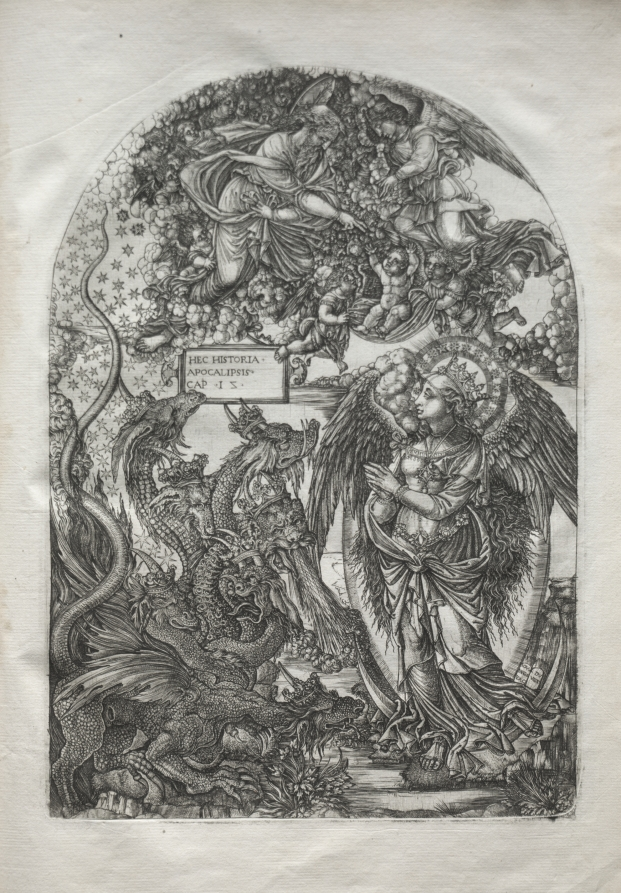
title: The Apocalypse: St. Michael and the Dragon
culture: France, 16th century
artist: Jean Duvet (French, 1485–1561)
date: 1546–1556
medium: engraving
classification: Print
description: This print is part of a bound volume of works illustrating the a narrative of the Apocalypse, taken from the Revelation of Saint John in the Bible. The 23 engravings in the series occupied the artist for a number of years and represent his greatest artistic achievement. The museum's volume is one of only seven known complete sets. Jean Duvet was one of the first major printmakers in France and one of the most original artists of the 1500s. Although he worked mostly in the provincial city of Langres, he became aware of Italian art through the circulation of prints—notably those of Marcantonio Raimondi. His solidly modeled human figures reflect the influence of the Italian High Renaissance. Duvet, however, developed an idiosyncratic, highly artificial style with crowded compositions that ignore rational space in favor of ornamental surface patterns.